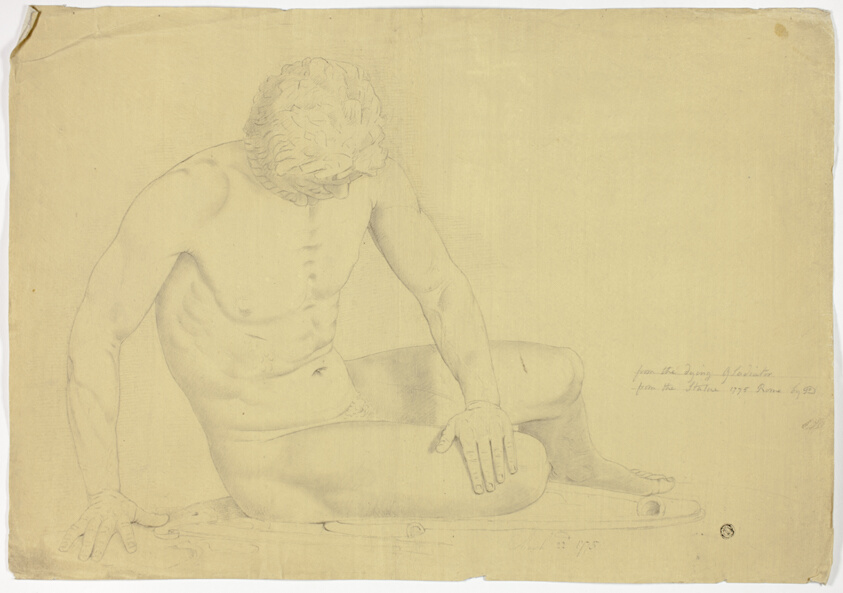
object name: Drawing and Watercolor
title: Statue of the Dying Gaul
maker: John Downman (English, 1750-1824)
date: 1775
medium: Charcoal with stumping and black crayon on ivory laid paper prepared with a tan ground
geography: England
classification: charcoal; drawings (visual works); prints and drawing